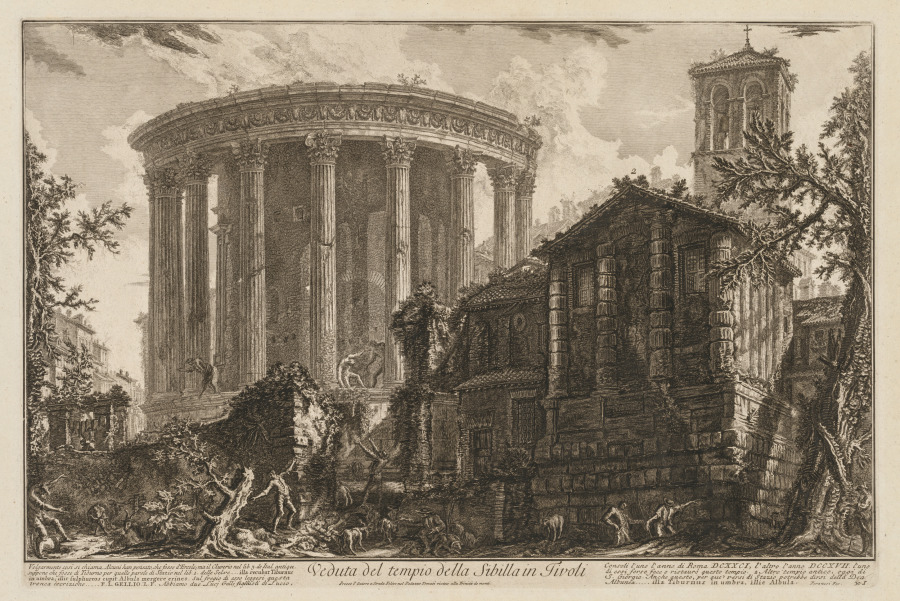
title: Views of Rome: Temple of the Sibyl at Tivoli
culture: Italy, 18th century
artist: Giovanni Battista Piranesi (Italian, 1720–1778)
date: c. 1761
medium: etching and engraving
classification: Print